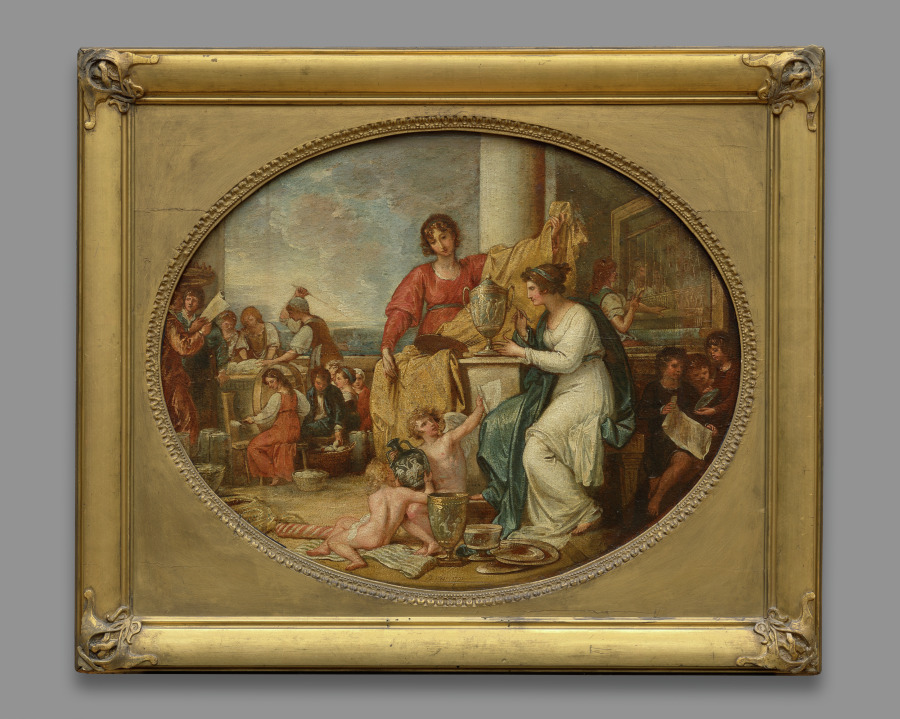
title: British Manufactory; A Sketch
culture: America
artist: Benjamin West (American, 1738–1820)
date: 1791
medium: oil on paper mounted on wood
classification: Painting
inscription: signed lower center: B. West 1791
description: As part of his work for the British court, Benjamin West produced several compositions celebrating the strength of the nation's economy. In this example, women in classical costumes paint vases, spin, and weave—a comparison of British manufacturing with the accomplishments of antiquity. One of a series of nine related sketches, this design was copied as a large mural decorating the Queen's Lodge at Windsor Castle, a room eliminated by remodeling in 1823.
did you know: Benjamin West was the first American artist to attain international fame.